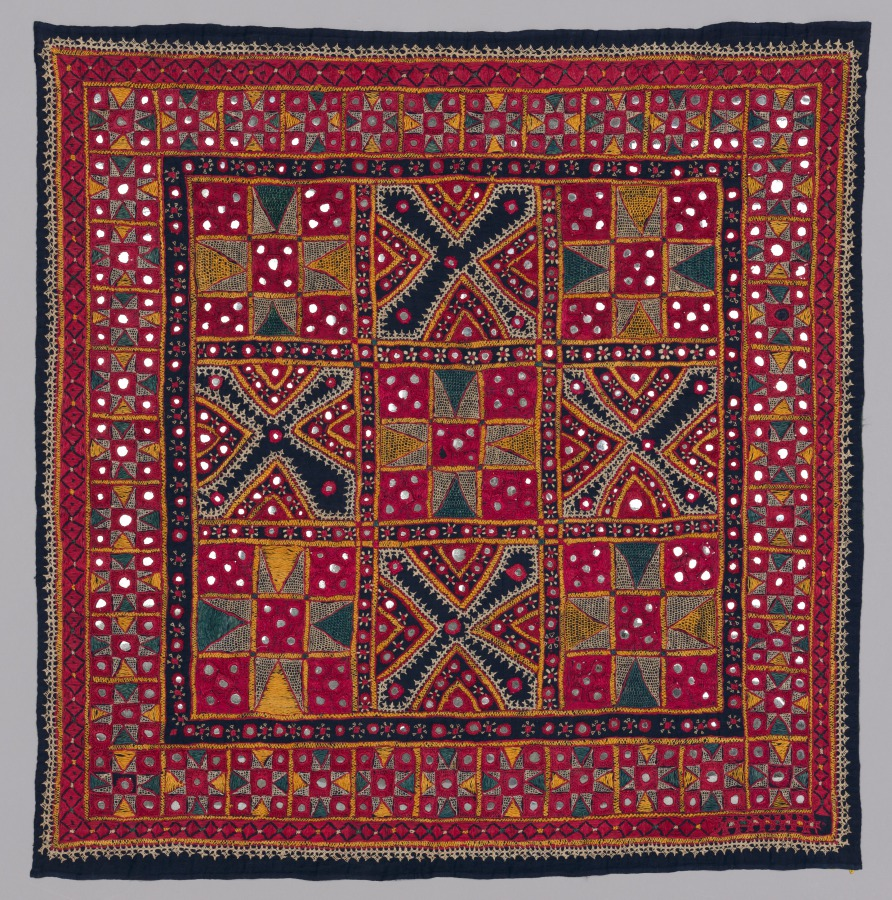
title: Chakla: Cloth used to Wrap Articles of Bride's Dowry, or as a Hanging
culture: India, Kathiawar, 19th century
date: 1800s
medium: embroidery; cotton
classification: Embroidery